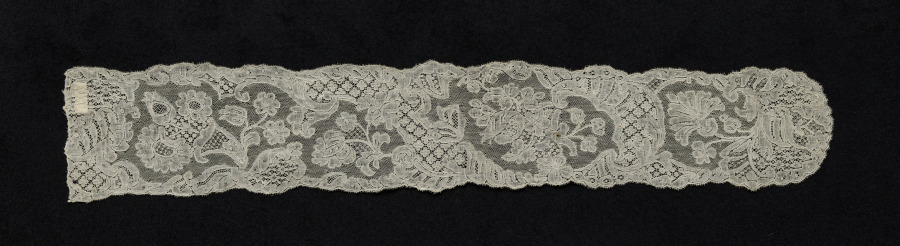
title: Lace Lappet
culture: Belgium, Mechelen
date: 1700s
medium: Linen: bobbin lace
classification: Lace